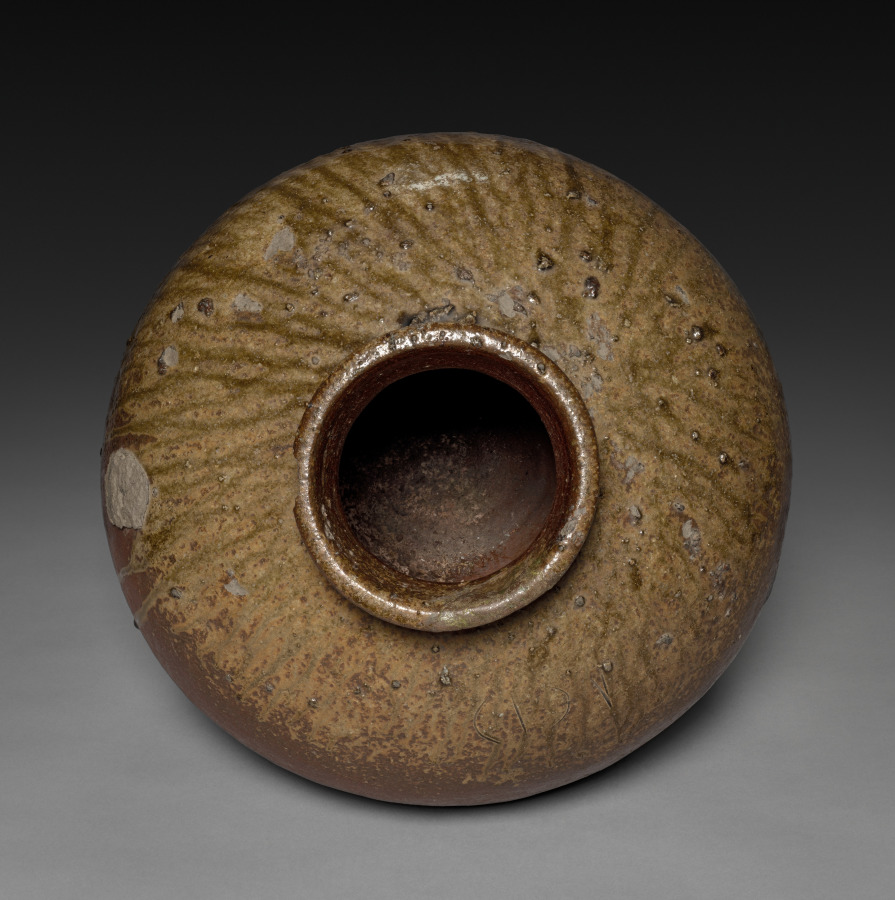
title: Storage Jar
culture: Japan, Muromachi period (1392–1573)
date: 1400s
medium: Stoneware with natural ash glaze (Echizen ware)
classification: Ceramic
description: Located in present-day Fukui prefecture northeast of Kyoto, the Echizen kilns produced ceramics with purplish-red skin flecked with white feldspar characteristic of the local clay used in this piece. Around 1700, the warm hue of Echizen wares gained popularity in tea practice, particularly when the vessels exhibited the rugged surface evident here in combination with the dynamic glossy glaze drips.